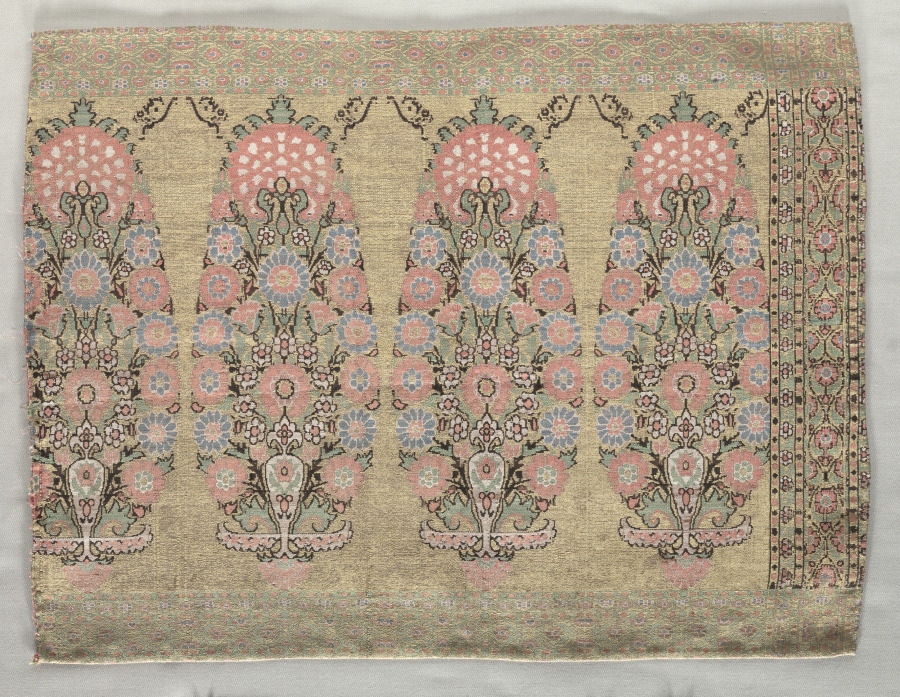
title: Two Pieces from a Scarf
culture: Iran, 18th century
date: 1700s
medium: brocade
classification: Textile